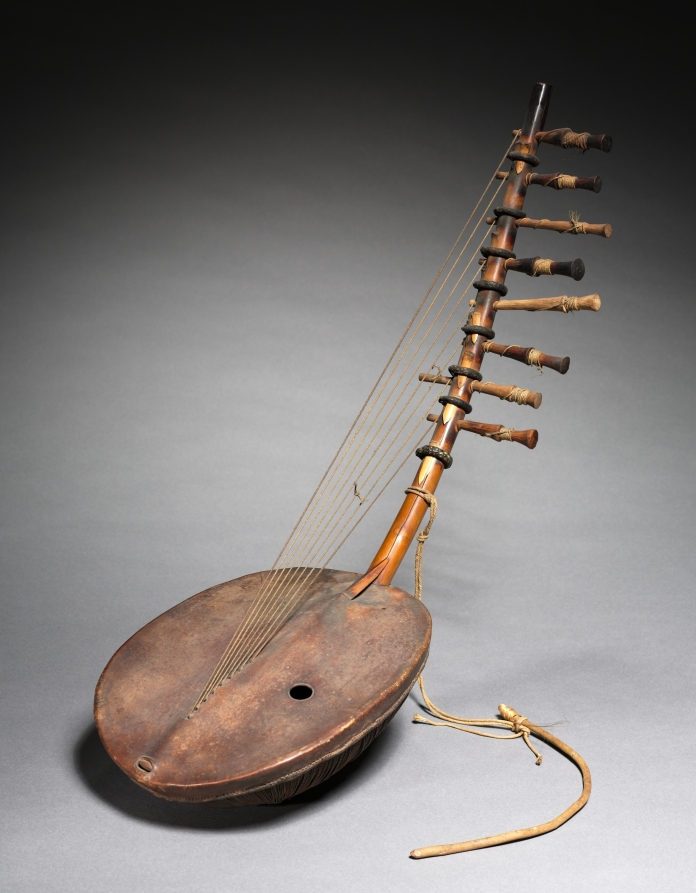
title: Musical Instrument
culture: East Africa, Uganda, 20th century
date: 1900s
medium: wood and leather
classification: Musical Instrument